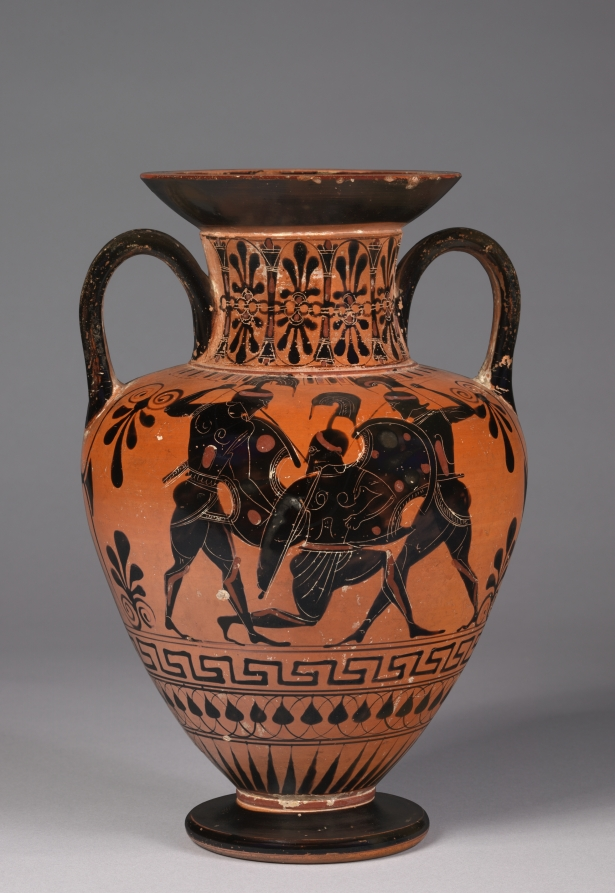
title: Black-Figure Neck-Amphora (Storage Vessel): Departing Warrior with Chariot (A); Battling Warriors (B)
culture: Greek, Attic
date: c. 520–510 BCE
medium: ceramic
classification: Ceramic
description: The two sides of this neck-amphora both depict warriors—one preparing to depart for battle in a four-horse chariot, three doing battle on the other side. Two of those battling hold spears and so-called “Boiotian shields,” with cutout sides, while the vanquished warrior holds only a round shield, apparently having lost his weapon. The departing warrior also holds a round shield, but the faded devices of these round shields differ on the two sides (a rosette and a bucranium, respectively), suggesting that the warriors carrying them differ as well.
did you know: A neck-amphora is a type of amphora with separately constructed neck and body.